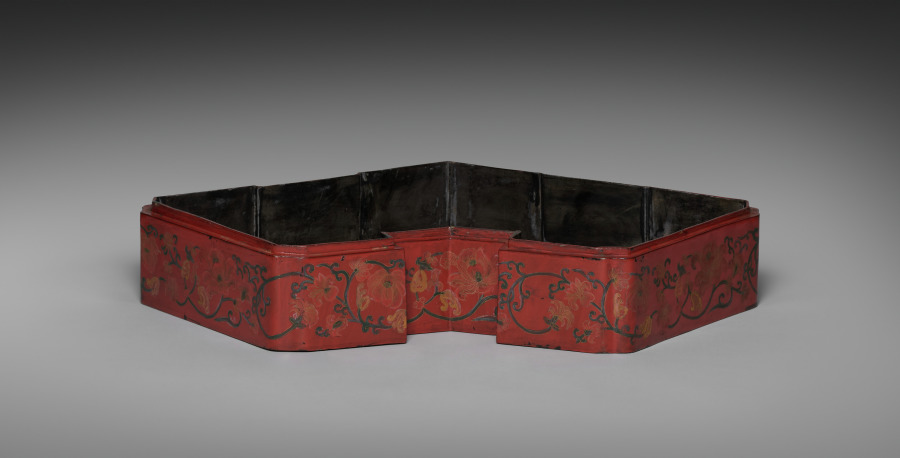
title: Middle Tier Box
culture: Japan, Edo period (1615–1868)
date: late 1700s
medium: red lacquer over a wood core, with litharge painting and engraved gold designs (Ryukyuan)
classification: Lacquer